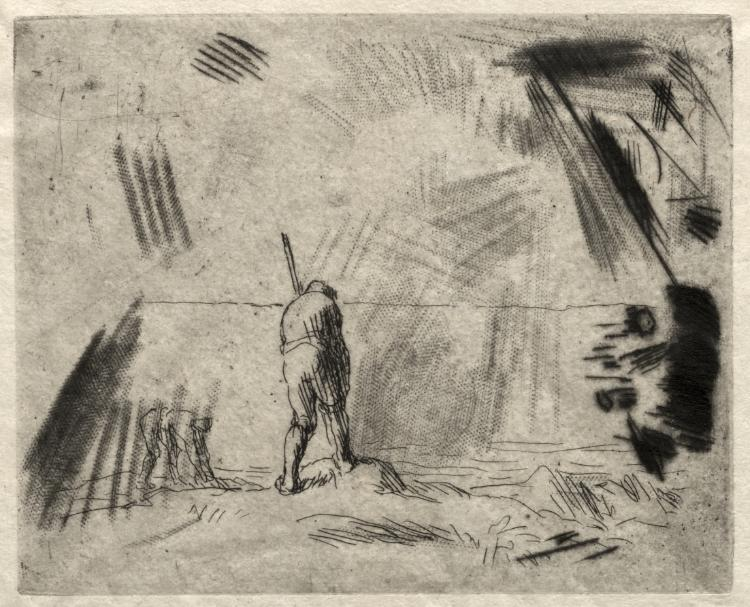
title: Kelp Gatherers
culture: France, 19th century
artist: Jean-François Millet (French, 1814–1875)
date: c. 1847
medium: etching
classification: Print